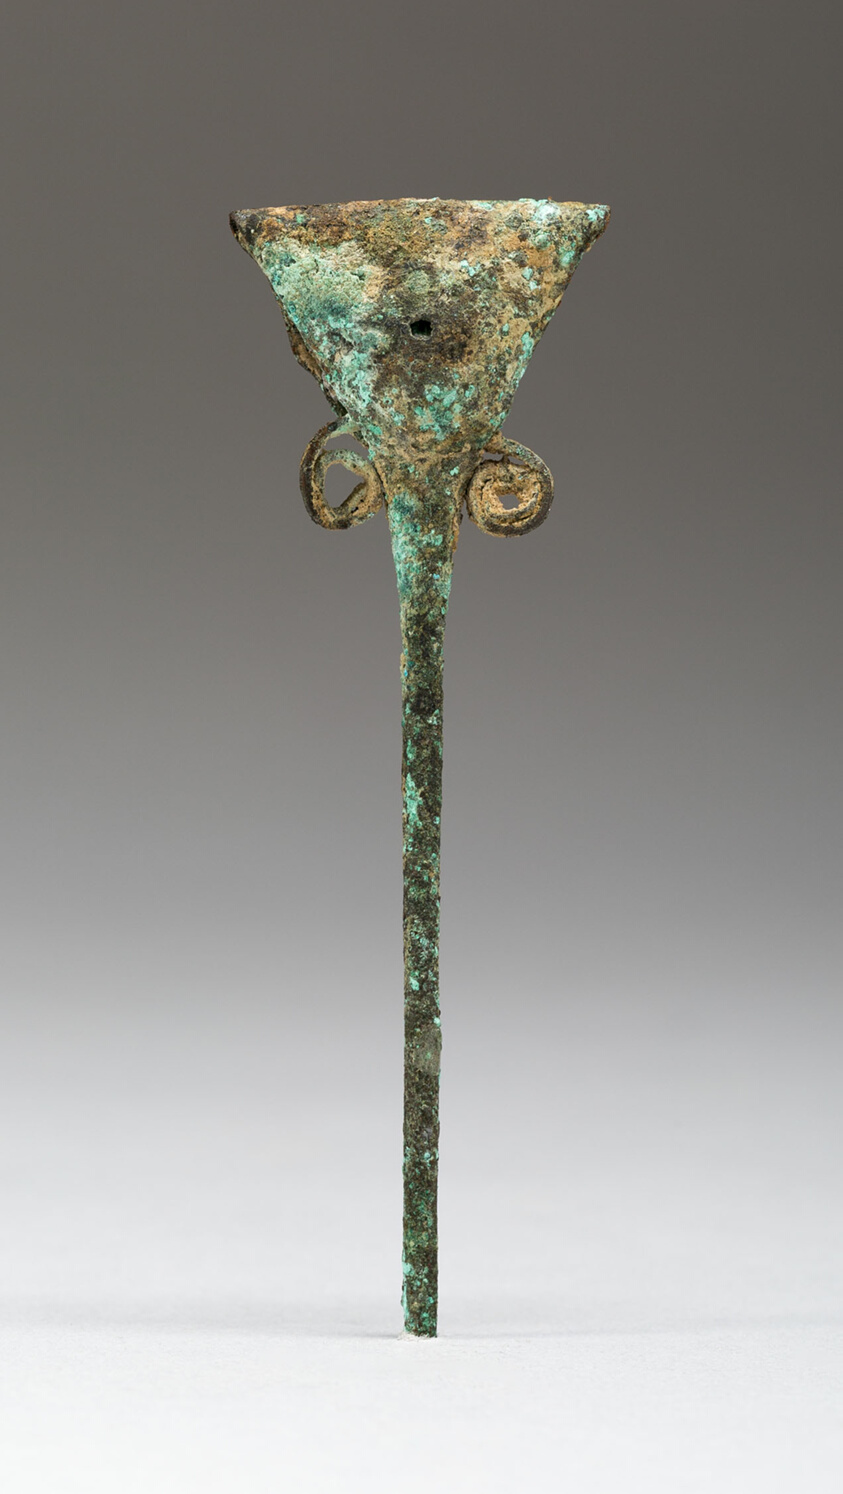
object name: Costume and Accessories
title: Hair Ornament or Pin with Triangular Head and Rattle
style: chimú, Arts of the Americas, andean, andes, inca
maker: Probably Chimú-Inca; North coast, Peru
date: 1000–1532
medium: Bronze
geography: Peru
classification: metal; jewelry; costume; art of the americas